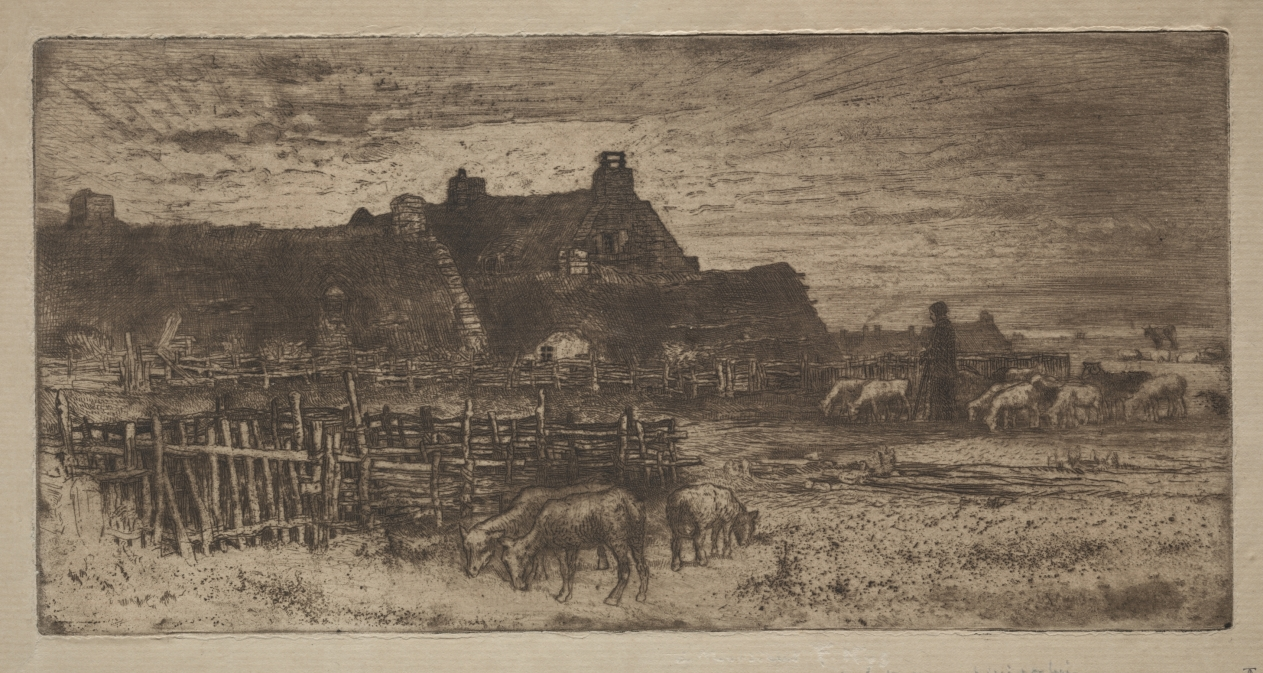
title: Sheepfold: Sunset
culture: France, 19th century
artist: Félix Hilaire Buhot (French, 1847–1898)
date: 1881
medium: etching and drypoint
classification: Print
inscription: inscribed, lower right, in graphite: "hommage [...] epreuve [...]"; signed, lower right, in graphite: "Felix Buhot"